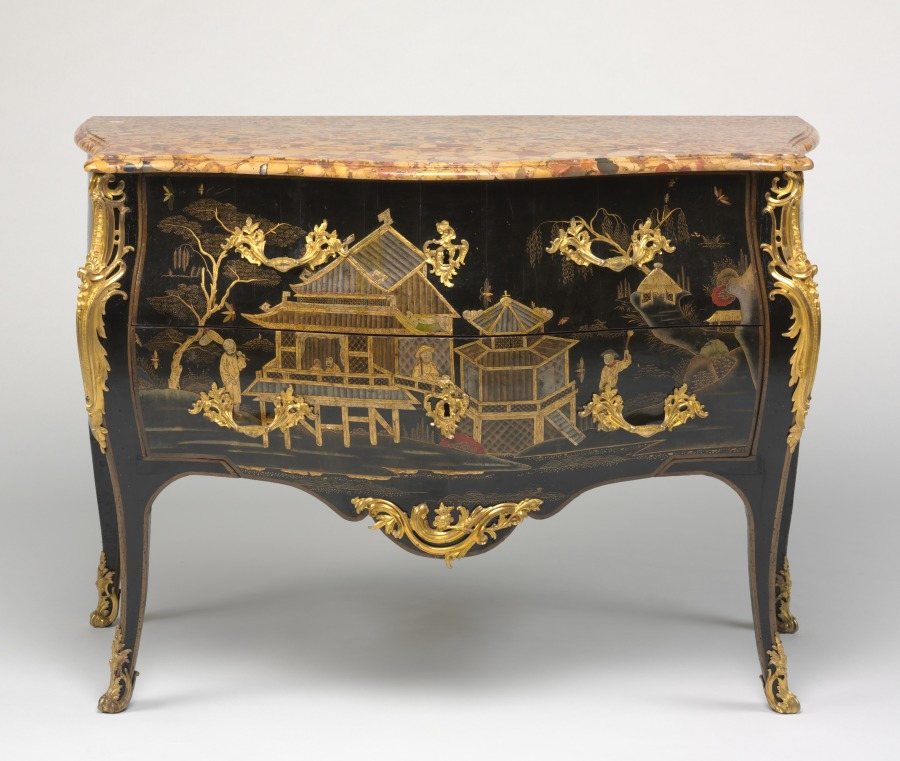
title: Chest of Drawers (Commode)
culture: France, 18th century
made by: probably by Adrien Faizelot Delorme (French)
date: c. 1750– 1765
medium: oak, black lacquer with raised chinoiserie decoration, gilt metal mounts, marble top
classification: Furniture and woodwork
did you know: Although this chest of drawers was made in France, its decoration is an imitation of Chinese lacquer, which reflects European perceptions of East Asia at the time.